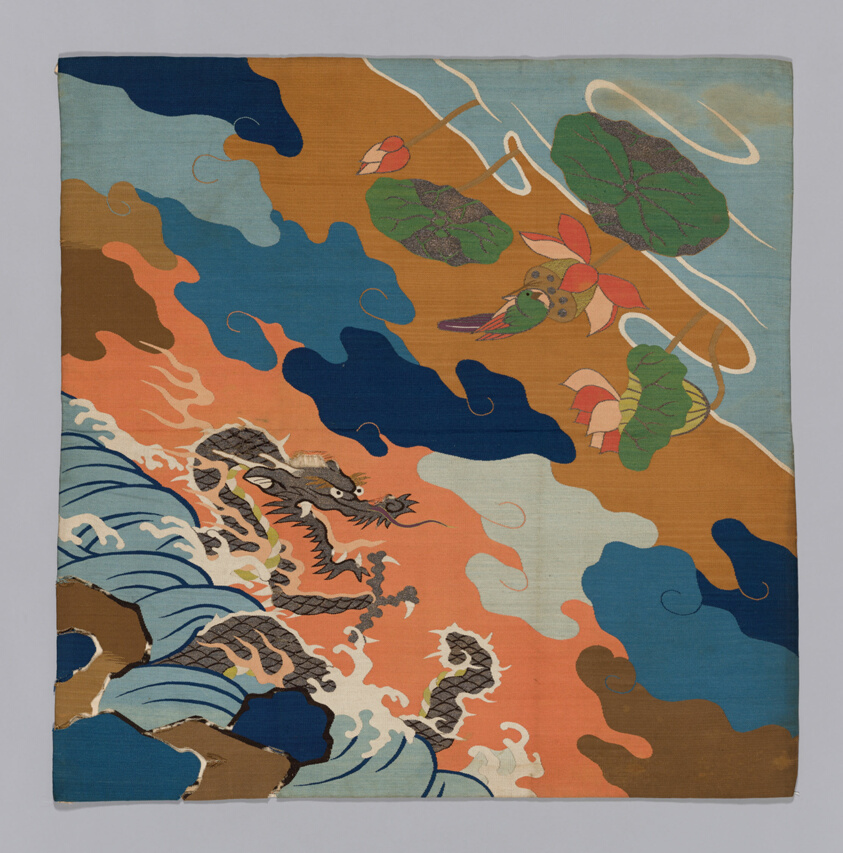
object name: Religious/Ritual Object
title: Uchishiki (Altar Cloth)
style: Japanism, edo (japanese period)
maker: Japan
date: Edo period (1615–1868), 1700/50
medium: Silk, silver-leaf-on-lacquered-paper-strip wrapped silk slit tapestry weave Lining: Cotton, plain weave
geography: Japan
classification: textile; liturgical - buddhist; weaving; ritual objects